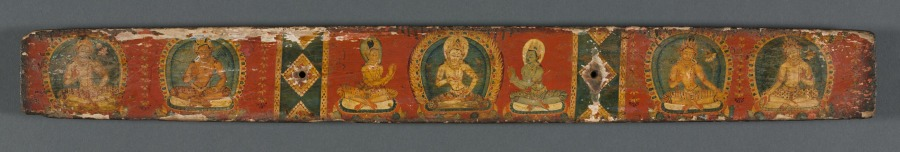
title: Manuscript of the Perfection of Wisdom in Eight Thousand Lines (Ashtasahasrika Prajnaparamita-sutra)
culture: Eastern India, Bihar, Vikramashila Monastery. Paintings: Nepal, Kathmandu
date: Sunday, September 14, 1119 (year 239 of the Newar Samvat in the month of Ashvina)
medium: Covers: Gum tempera, colors, and paper on wood; pages: gum tempera and ink on palm leaves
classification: Painting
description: The colophon at the end of the manuscript indicates that a monk from Nepal named Aryashrimittra traveled to a monastic university in India, where he commissioned this copy of a sacred Buddhist philosophical text. He then brought it with him back to Nepal, where Nepalese artists added paintings of Buddhist goddesses and bodhisattvas. The movement of monks and manuscripts between India and Nepal was the primary mechanism for the transmission of Buddhism to the Himalayas. This manuscript was an object of worship, once venerated alongside sacred Buddhist images. Devotional materials applied during ritual worship remain on the top of the book cover.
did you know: Books of the Perfection of Wisdom were worshiped as sacred objects and personified as the Goddess of Wisdom, Prajnaparamita, the mother of all Buddhas.